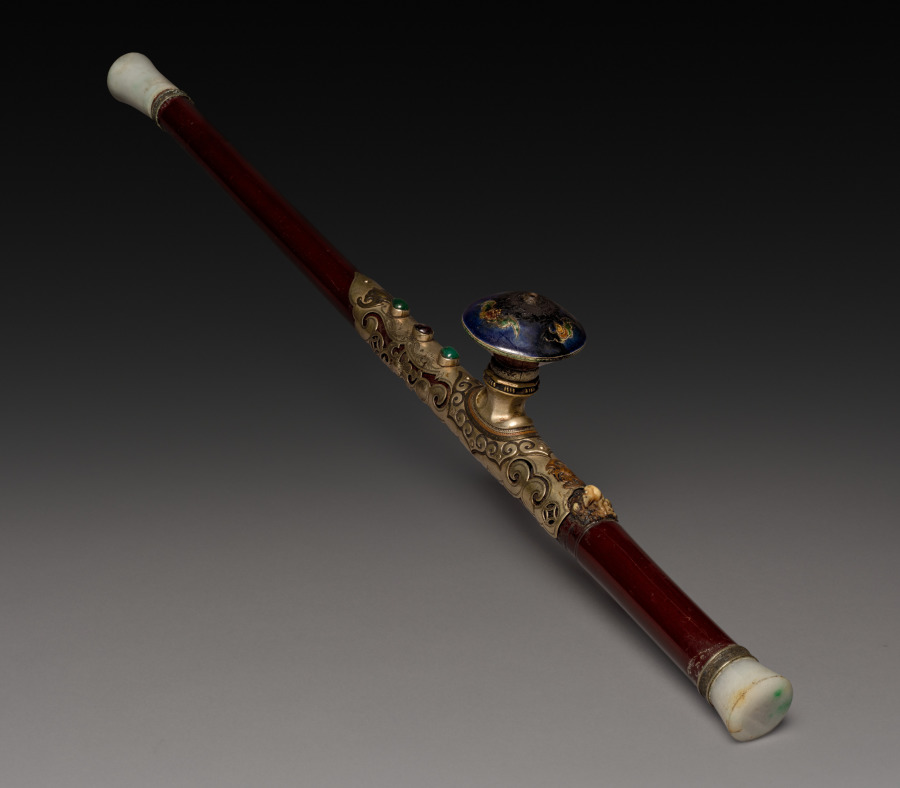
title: Opium Pipe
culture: China, Qing dynasty (1644-1911)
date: 1800s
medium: lacquer, jade, and silver decoration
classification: Miscellaneous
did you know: The aubergine pottery bowl is decorated with bats in orange and green glaze.